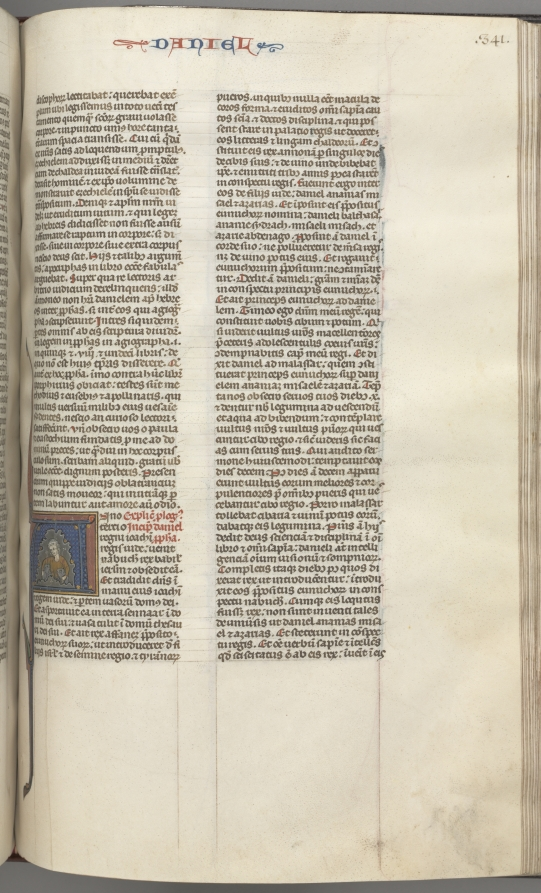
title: Fol. 341r, Daniel, historiated initial A, Daniel in the lions’ den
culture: Southern France, Toulouse(?), 13th century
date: c. 1275–1300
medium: ink, tempera and gold on vellum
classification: Bound Volume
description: Biblical manuscripts were highly prized and important possessions of churches, monasteries, cathedral schools, and universities throughout medieval Europe. The biblical texts were known as the vulgate, the translations made by Saint Jerome in the fourth century from Hebrew and Greek into Latin, which became the definitive and official Latin version of the Roman Church. In the 13th century, the bible was, for the first time, produced as a single volume with an officially sanctioned sequence to its books and chapters as illustrated by this example. The very extensive decoration of this bible is arranged hierarchically to indicate the relative importance of the various texts so that full or almost full-page initials mark the openings of the first prologue, Genesis, and the first Gospel; historiated initials mark the beginning of each book and illuminated initials mark the Prologues.